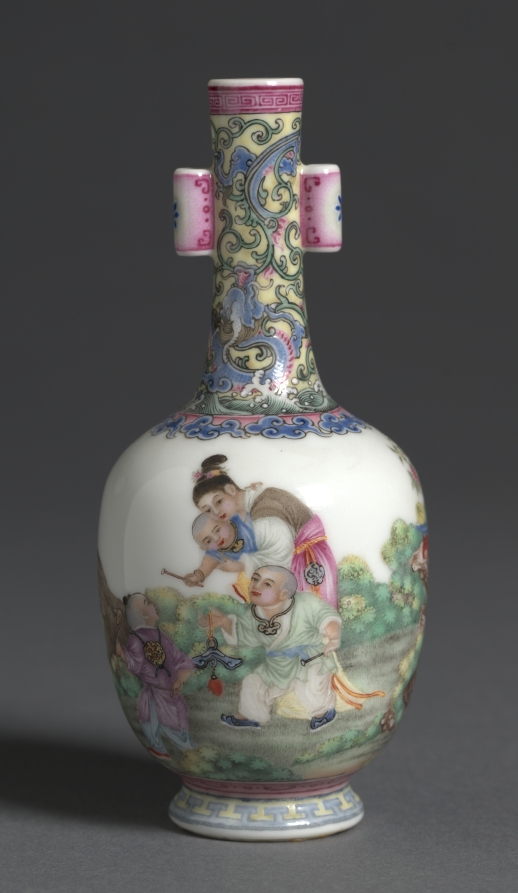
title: Vase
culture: China, Qing dynasty (1644-1911), Qianlong mark and reign (1736-95)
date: 1736–95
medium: Porcelain with decoration in colored fa-lang enamels, Guyuexuan ware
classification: Ceramic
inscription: 乾隆年製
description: The four-character mark on the base of this vase indicates that it was made in Jingdezhen and then sent to Beijing to be decorated in the imperial workshops by painters who were trained in using Western perspective and shading.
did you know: The child in orange has a bun above his ear, while the rest of his head is clean-shaven, like the other children’s.